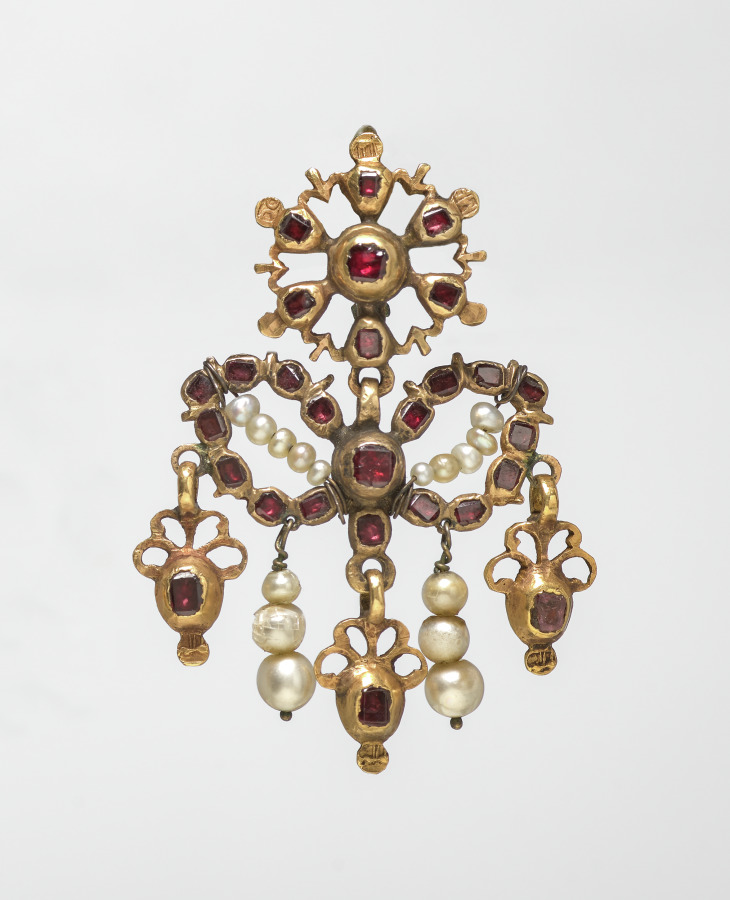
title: Woman's Costume (Earring)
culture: Italy, 19th century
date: 1800s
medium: gold and jewels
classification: Jewelry